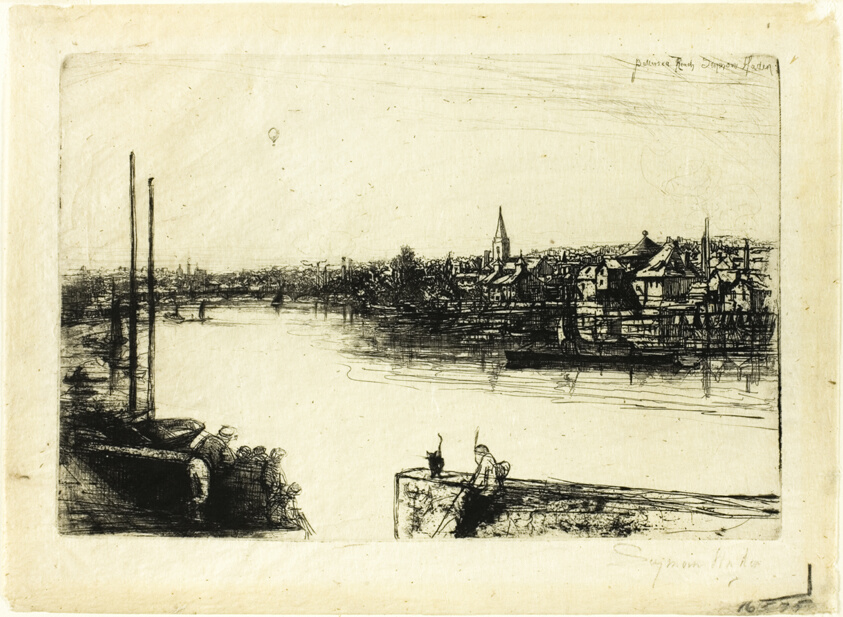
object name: Print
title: Battersea Reach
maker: Francis Seymour Haden (English, 1818-1910)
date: 1863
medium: Etching with drypoint on cream Japanese paper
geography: England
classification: etching; print; prints and drawing